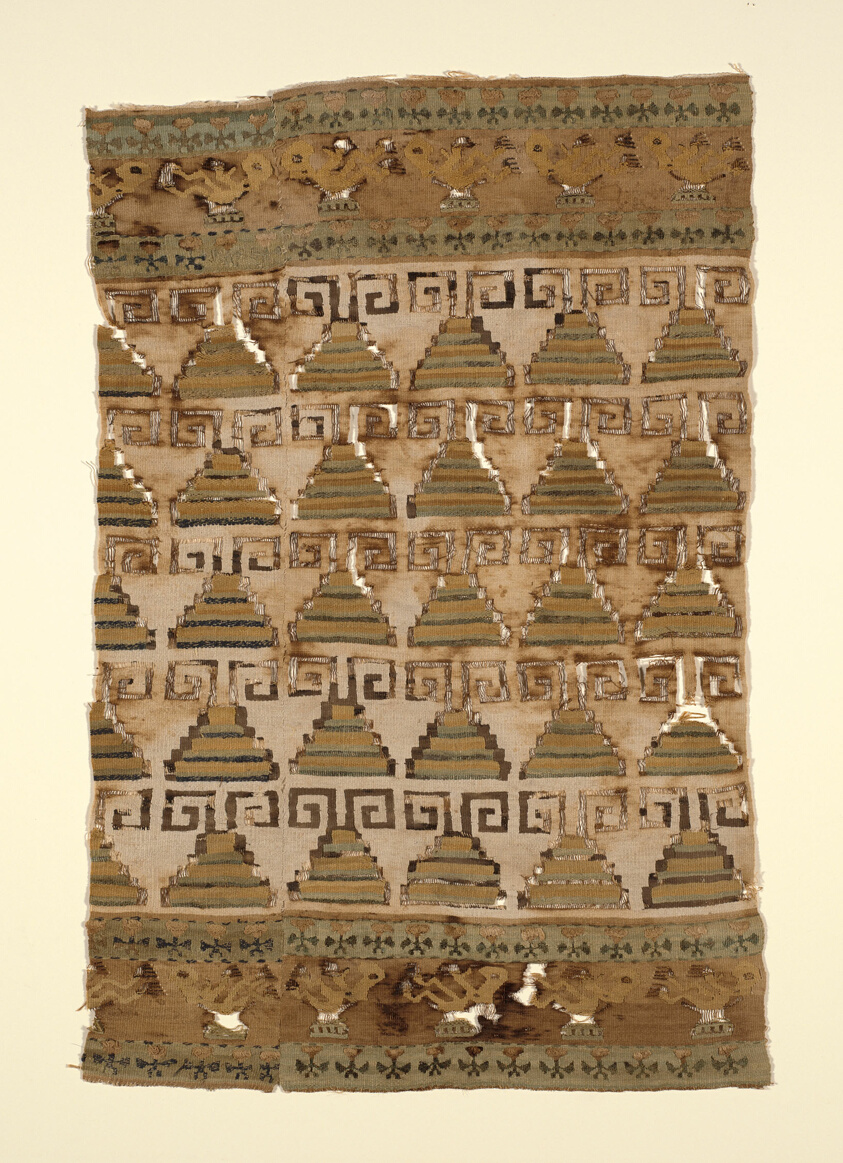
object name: Textile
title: Panel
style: lambayeque, Pre-Columbian, north coast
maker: Lambayeque (North coast, Peru)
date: 1000/1476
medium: Two panels joined: cotton and wool (camelid), slit and single dovetailed tapestry weave with weft loop pile and supplementary patterning wefts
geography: Peru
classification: textile; weaving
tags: earth, animals, birds, farming, fish, plant-derived motif, plants, pyramid, sealife, temple